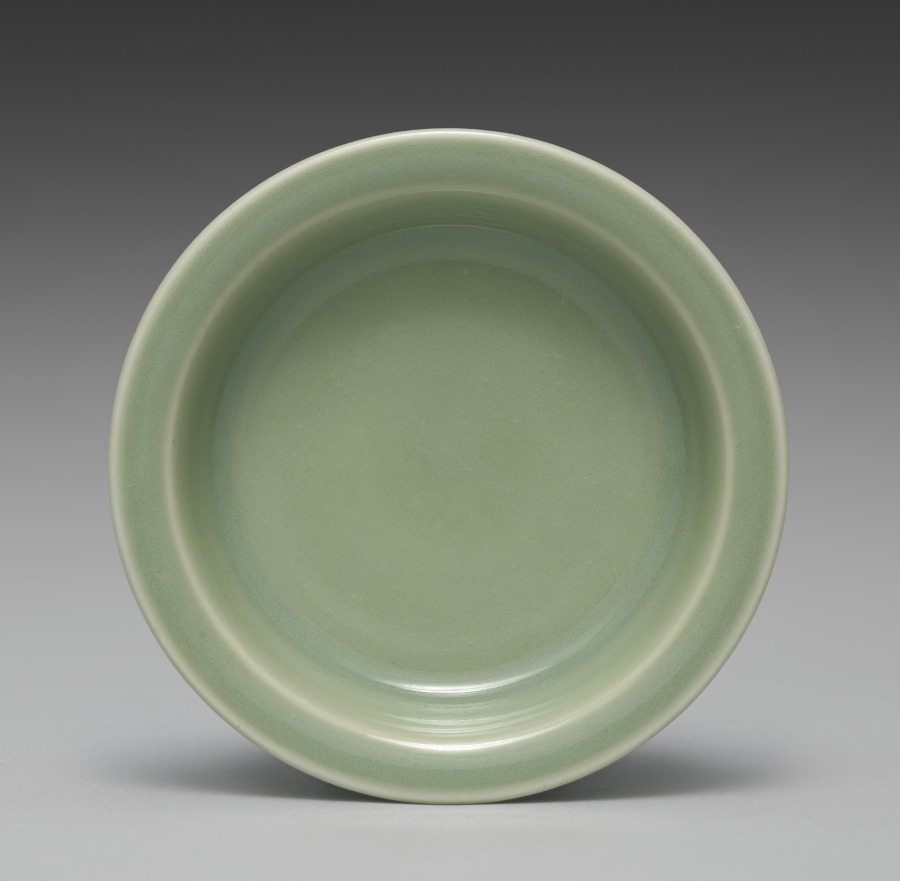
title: Saucer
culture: Japan, Meiji period (1868–1912)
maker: Seifū Yohei III (Japanese, 1851–1914)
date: 1893–1914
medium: One from a set of ten dishes; porcelain with green glaze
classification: Ceramic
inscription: 清風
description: Yohei III’s main output for his sophisticated clientele was in the form of tea sets and dining sets. He created a range of dishes in green glazes. He often produced in pairs, sets of five, or sets of ten. For this set of ten small dishes in a simple, round form that emphasizes the glaze above all, the box lid designates the piece as seiji, or green-glazed porcelain, using a general term for the extensive palette of green glazes often called celadon in English. The box lid further identifies the dishes themselves as tōchō, literally “bean-sized saucers,” a size that makes them suitable for dipping sauces.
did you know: The ten dishes in this set are stored in stacks of five in a two-compartment box.